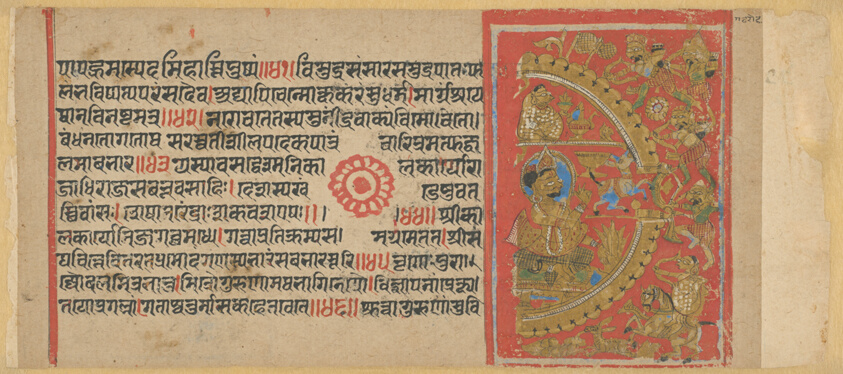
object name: Painting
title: The Siege of Ujjain and the Slaying of the Magic Donkey, from a copy of the Kalakacharyakatha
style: South Asian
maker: India; Gujarat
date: c. 1450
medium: Opaque watercolor and gold on paper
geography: India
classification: miniature painting; manuscript; asian art; painting